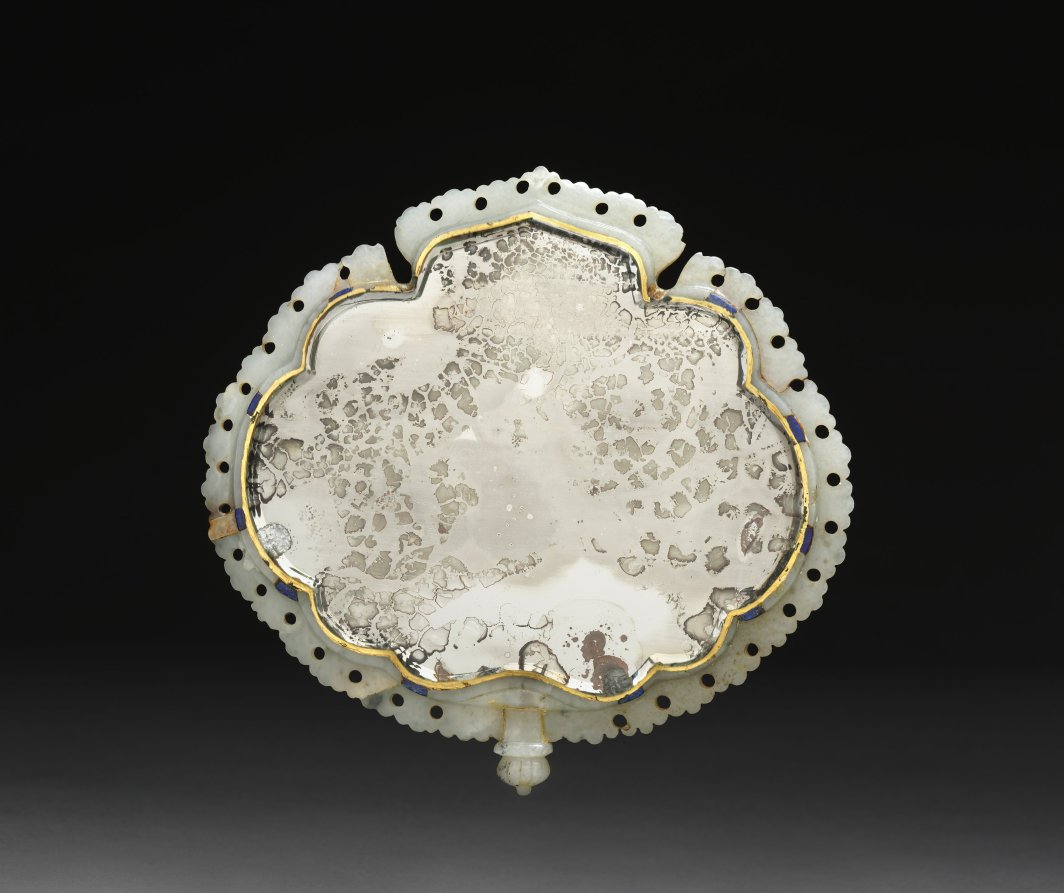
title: Mirror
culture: India, Mughal dynasty (1526-1756)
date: early 18th Century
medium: jade with gold and enamel inlay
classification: Jade